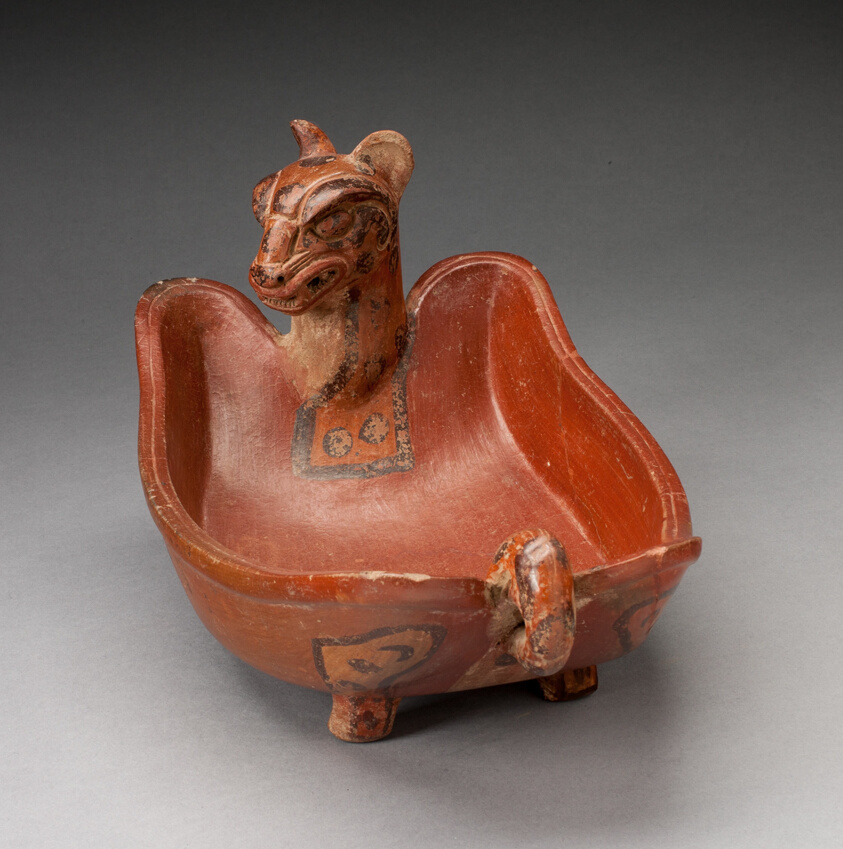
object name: Vessel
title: Open Bowl in the Form of a Jaguar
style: lower central america, Arts of the Americas, nicaragua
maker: Ometepe Island, Lake Nicaragua (Cocibolca), Nicaragua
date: 600–900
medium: Ceramic and pigment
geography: Isla de Ometepe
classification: bowl; art of the americas; ceramics; vessel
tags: animals